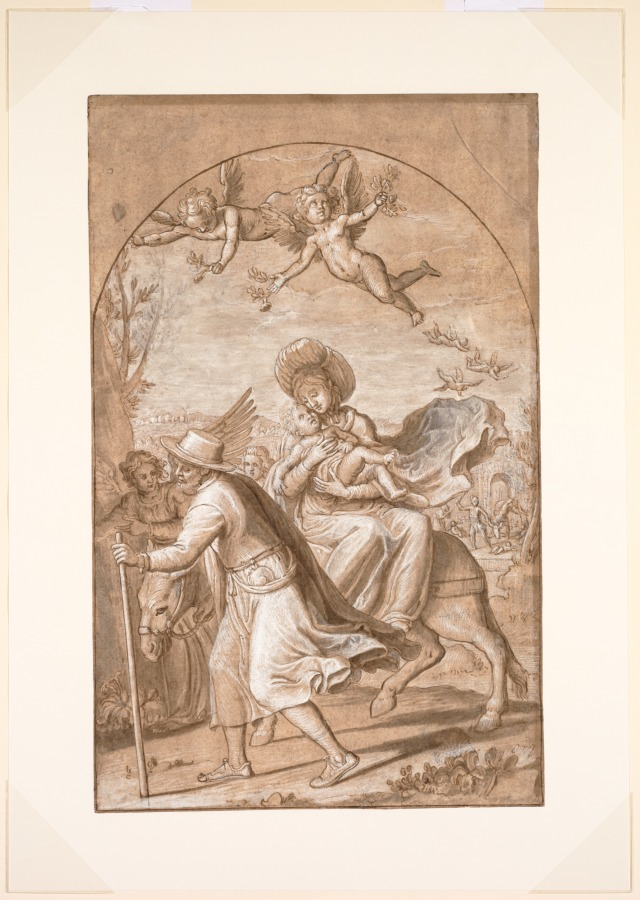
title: The Flight into Egypt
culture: Italy, 16th century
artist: Gregorio Pagani (Italian, 1558–1605)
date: c. 1590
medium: pen and brown ink and wash, heightened with white, over black chalk, on beige paper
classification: Drawing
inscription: Inscribed, upper left, "i. . .", and numbered, upper right, 52 inscribed in brown ink, "verso, Di mano del Bamberucci denetri (?) da lui" and "pagani" (?)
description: In this composition, Gregorio Pagani remained close to the New Testament account of the final episode of Christ’s nativity (Matthew 2:13–23), in which Joseph, Mary, and infant Jesus fled into Egypt after learning that King Herod intended to kill all the male infants of Jerusalem. Staff in hand, Joseph forges ahead while Mary and Jesus follow behind on a donkey. Fluttering angels hover above; one at the left urges the Holy Family onward. Pagani was commissioned by the Médicis to create decorative schemes for their celebrations, and especially for altarpieces for churches and convents, but few of his paintings have survived. He is best known for highly finished, fully realized drawings such as this example in pristine condition.